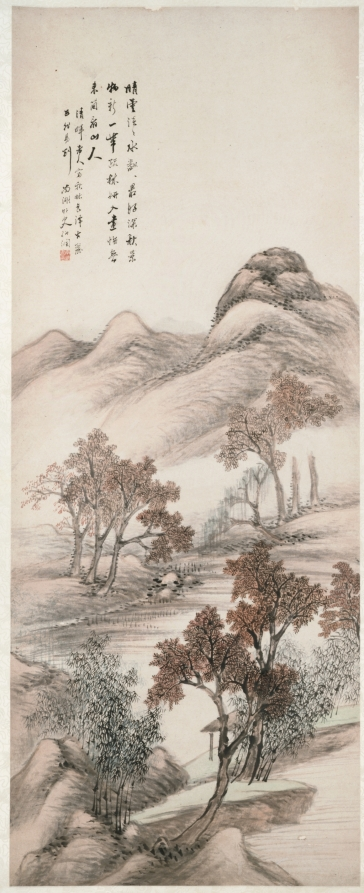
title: Autumn Landscape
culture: China, Jiaxing, Qing dynasty (1644-1911)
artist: Yang Borun (Chinese, 1837–1911)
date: late 1800s–1911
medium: hanging scroll, ink and color on paper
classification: Painting